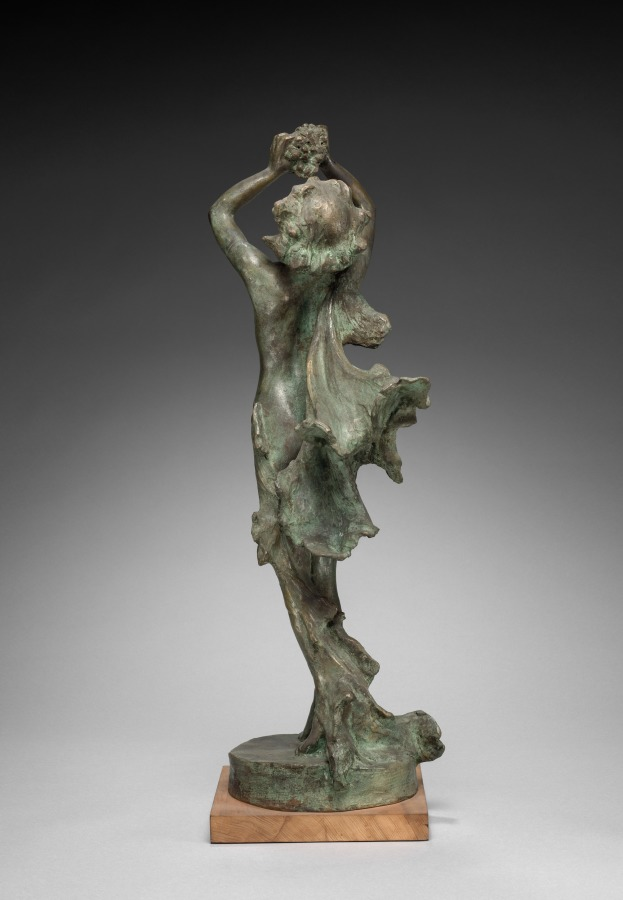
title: Fountain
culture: America, Ohio, Cleveland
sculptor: Jessica Wakem McMurray (American, born England, 1874–1950)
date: 1920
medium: bronze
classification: Sculpture